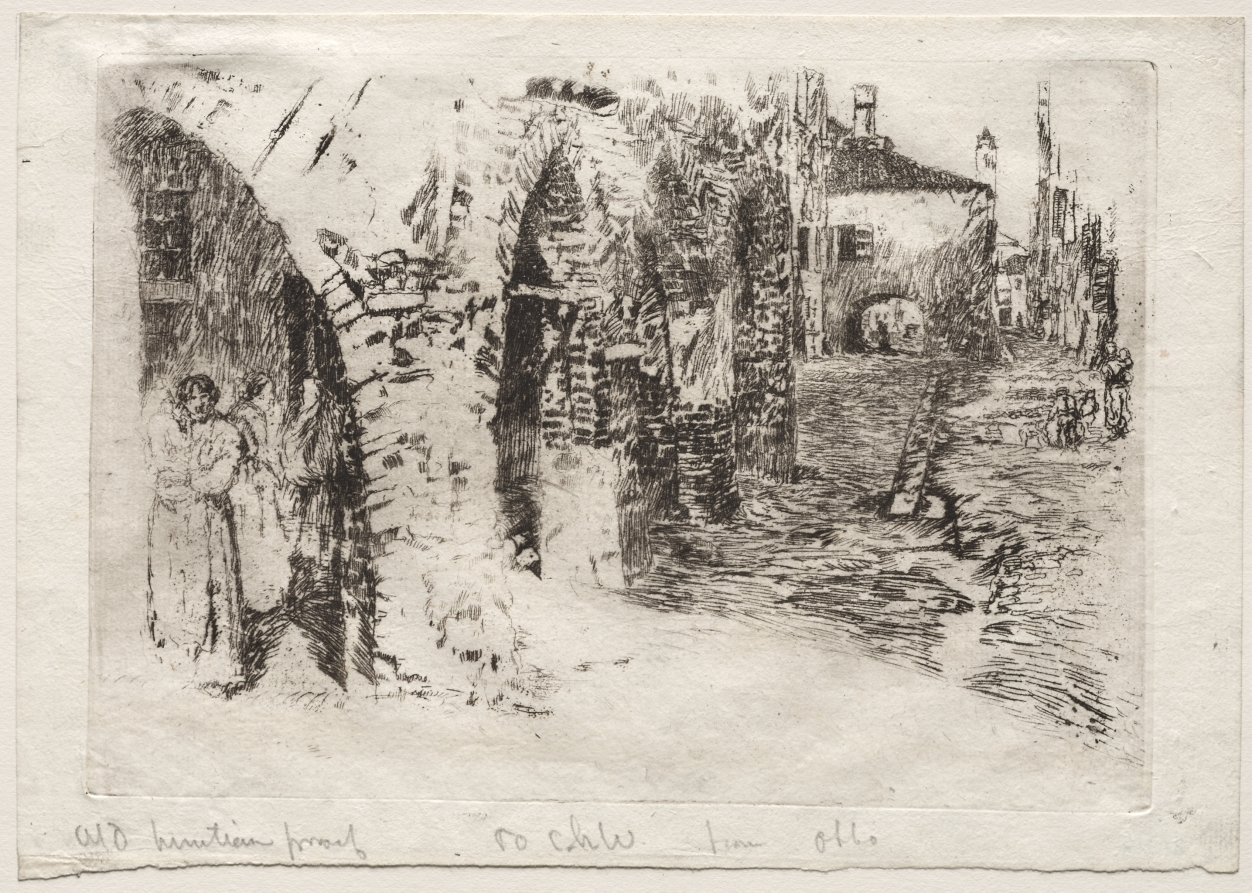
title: Chioggia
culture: America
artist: Otto H. Bacher (American, 1856–1909)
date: 1880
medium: etching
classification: Print